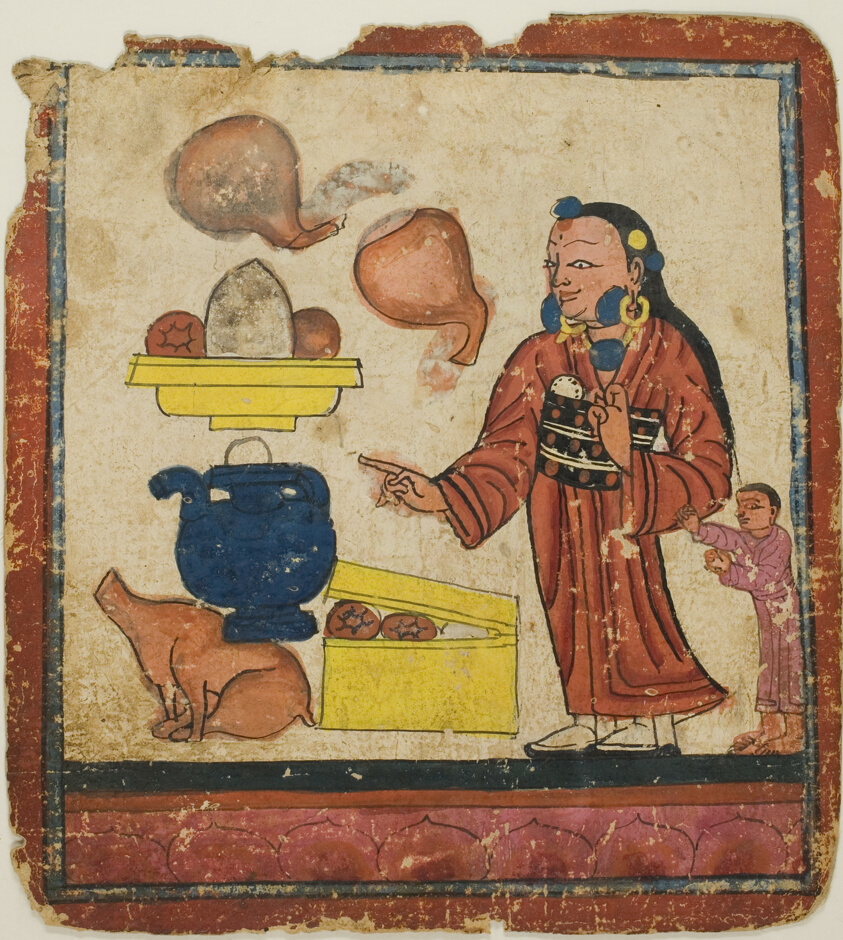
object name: Religious/Ritual Object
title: Presentation of Offerings, from a Set of Initiation Cards (Tsakali)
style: Himalayan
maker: Southern Tibet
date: 14th/15th century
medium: Ink and watercolor on paper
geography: Tibet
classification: ink; ritual objects